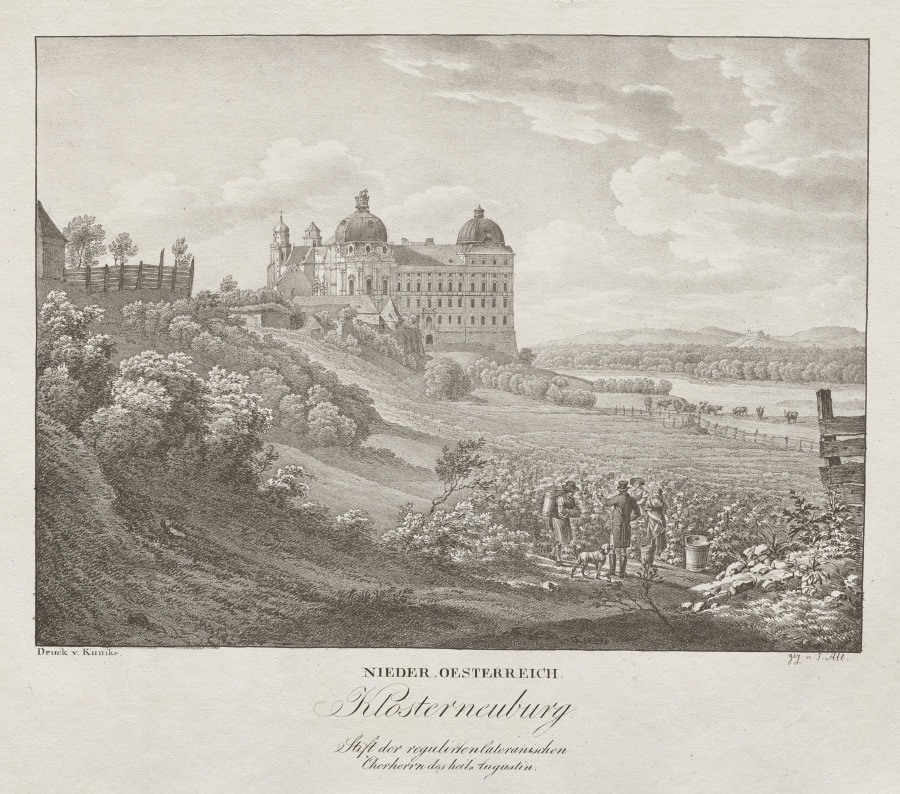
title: Nieder-oesterreich, Klosterneuberg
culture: Austria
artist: Jakob Alt (Austrian, 1789–1872)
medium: lithograph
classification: Print